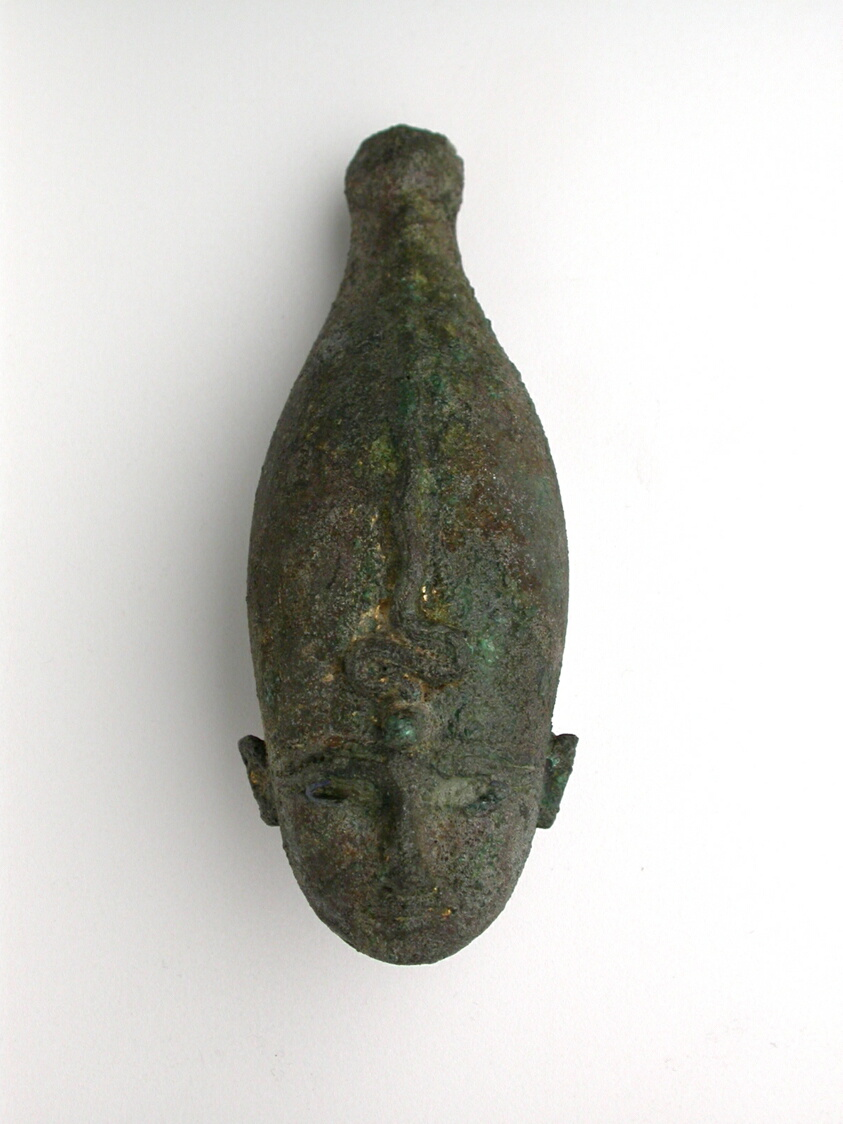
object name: Sculpture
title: Head of the God Osiris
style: egyptian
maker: Egyptian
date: Third Intermediate Period (about 1069–664 BCE)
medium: Bronze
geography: Egypt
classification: bust/head; bronze; metal; sculpture; ancient art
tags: gods (deities)